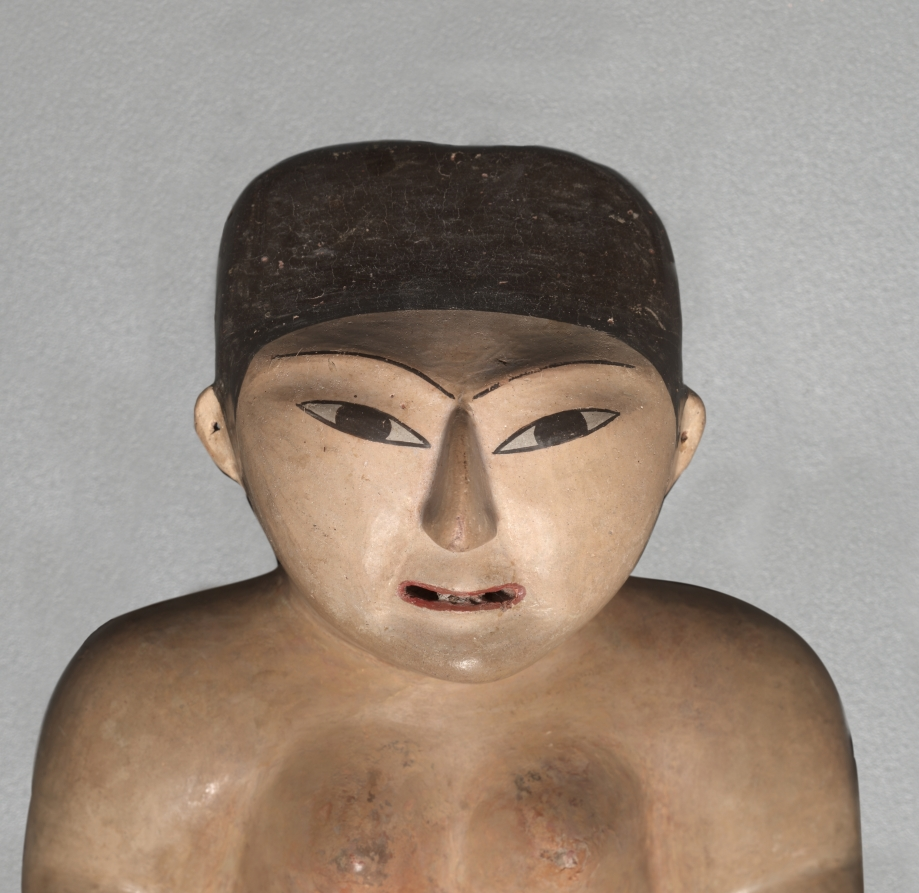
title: Female Figure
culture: Peru, South Coast, Nasca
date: 100 BCE–700 CE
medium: earthenware with colored slips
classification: Sculpture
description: This figure, which may once have worn small garments, might be a tomb offering. Her tapered head reflects the practice of cranial shaping, which may identify her social group and serve as a mark of beauty. Her fleshy hips likely refer to human and plant fertility, since food is the source of such bodily wealth. Her identity is unknown.